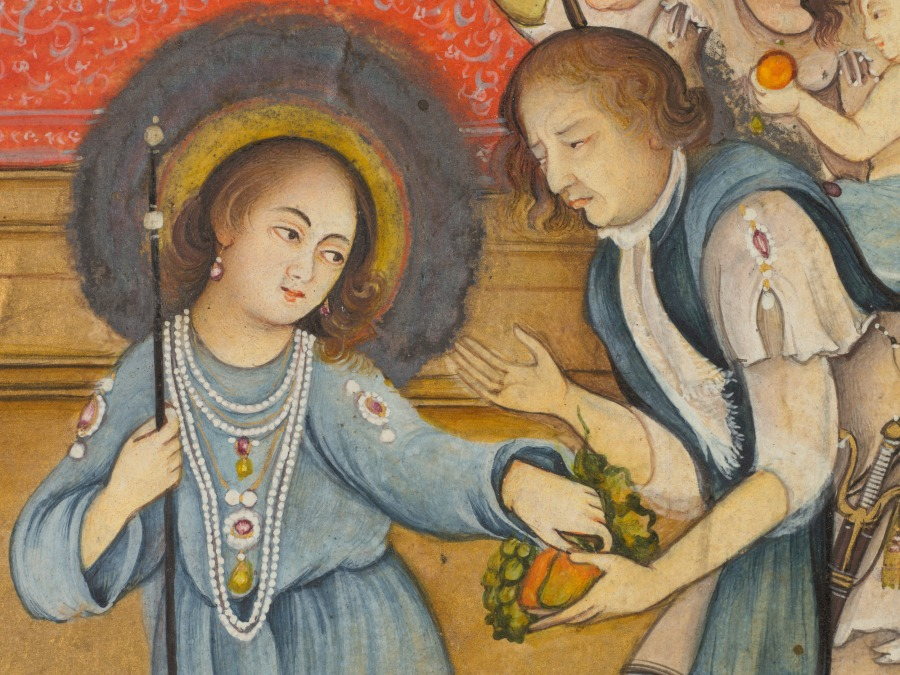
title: Jesus among the doctors in the Temple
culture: India, Lucknow, Mughal, 18th century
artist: Mir Kalan Khan (Indian, c. 1730–1775)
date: c. 1760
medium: Gum tempera and gold on paper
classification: Painting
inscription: Persian inscription on verso: an image of Blessed Miriam, work of Mir Kalan Khan